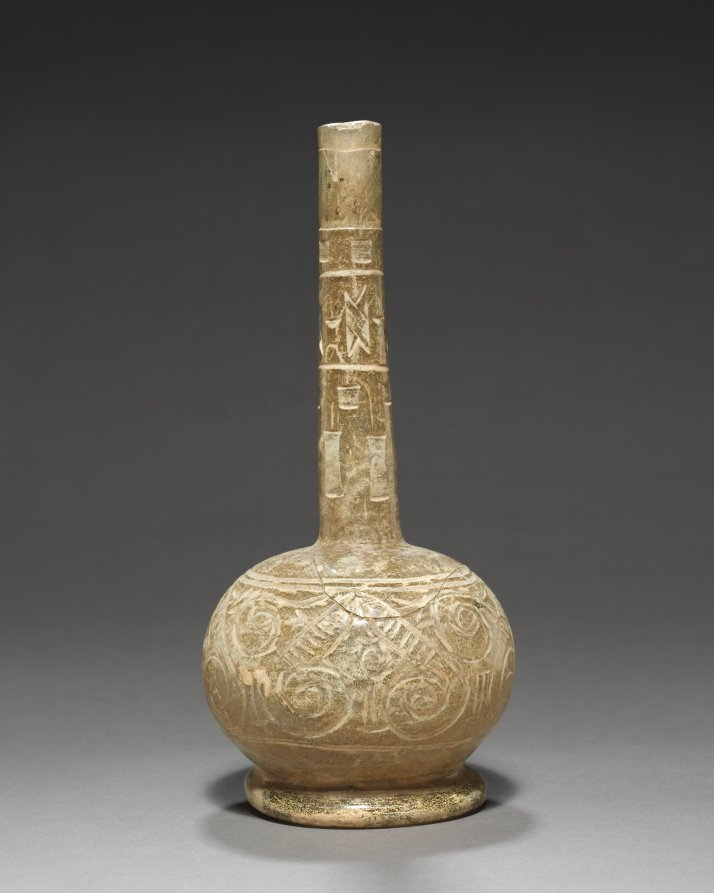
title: Bottle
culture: Iran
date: 800s–900s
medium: glass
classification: Glass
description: This glass bottle has a wide decorative band of geometric and spiral motifs carved onto its body and neck.